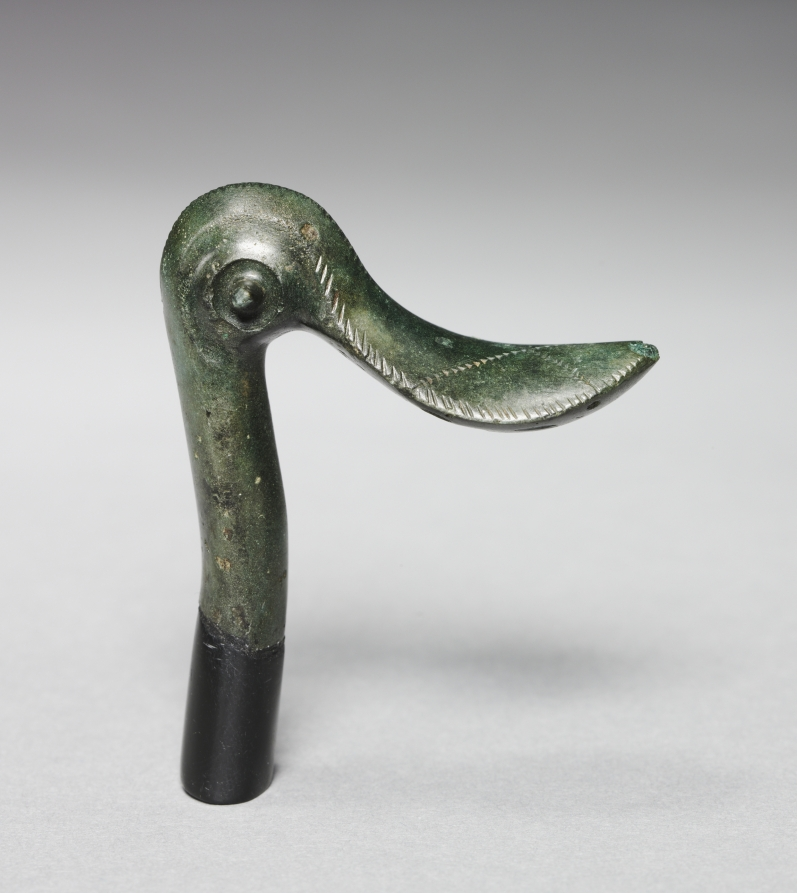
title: Duck Head Finial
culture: possibly Hungary, Bronze Age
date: c. 1400–1300 BCE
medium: bronze, cast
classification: Sculpture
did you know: A decorative object, this duck head finial likely topped a piece of furniture.